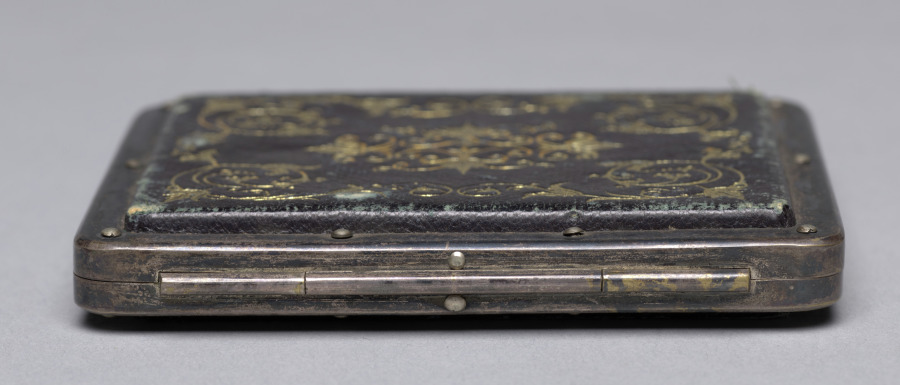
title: Construction of the John Stewart Store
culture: America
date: c. 1856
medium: daguerreotype, sixth plate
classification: Photograph